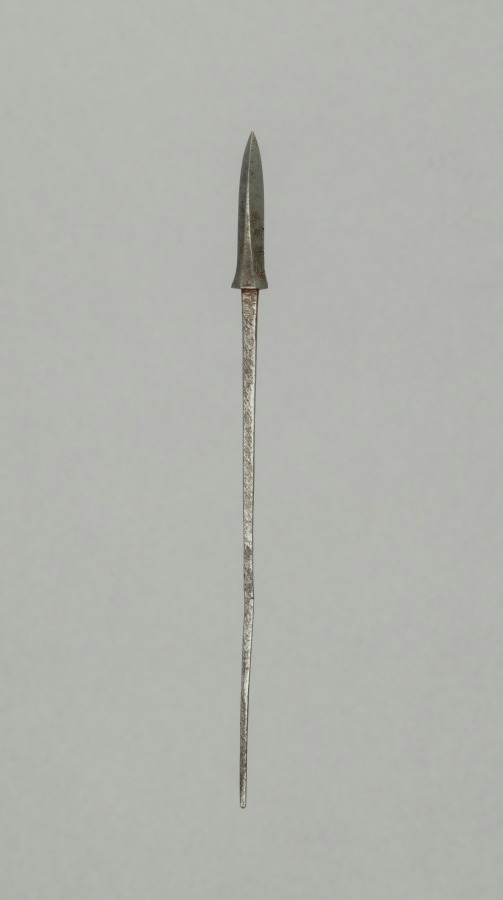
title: Arrow Point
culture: Japan, Edo period (1615–1868)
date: 1700s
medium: steel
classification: Arms and Armor